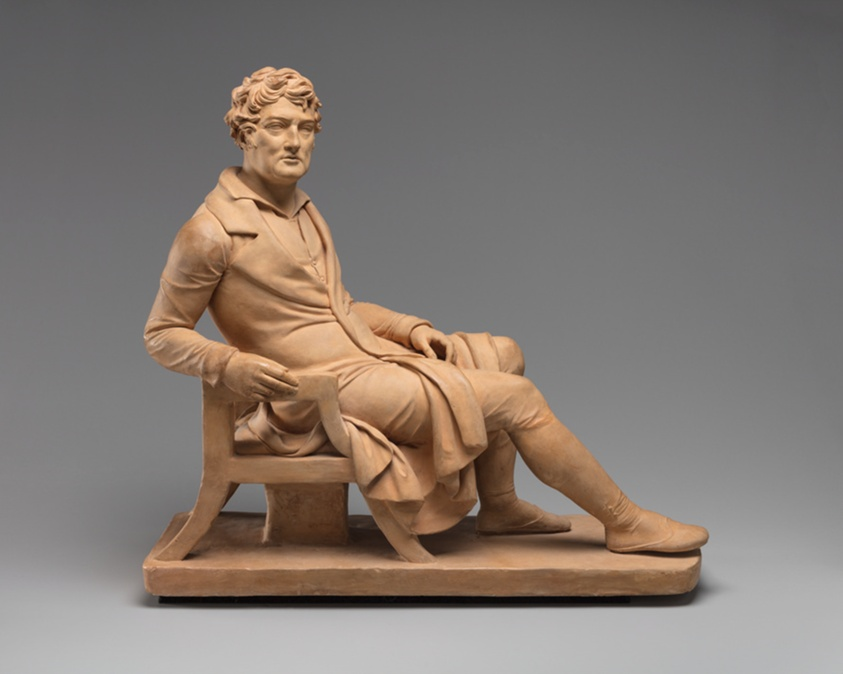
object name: Sculpture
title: George Banks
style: nineteenth century, european, 19th century, english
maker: Joseph Gott (English, 1786–1860)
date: c. 1828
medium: Terracotta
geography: England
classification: sculpture; portrait; british; terracotta (sculpture)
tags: portraits, chair, man, portraits: male subject, portrait